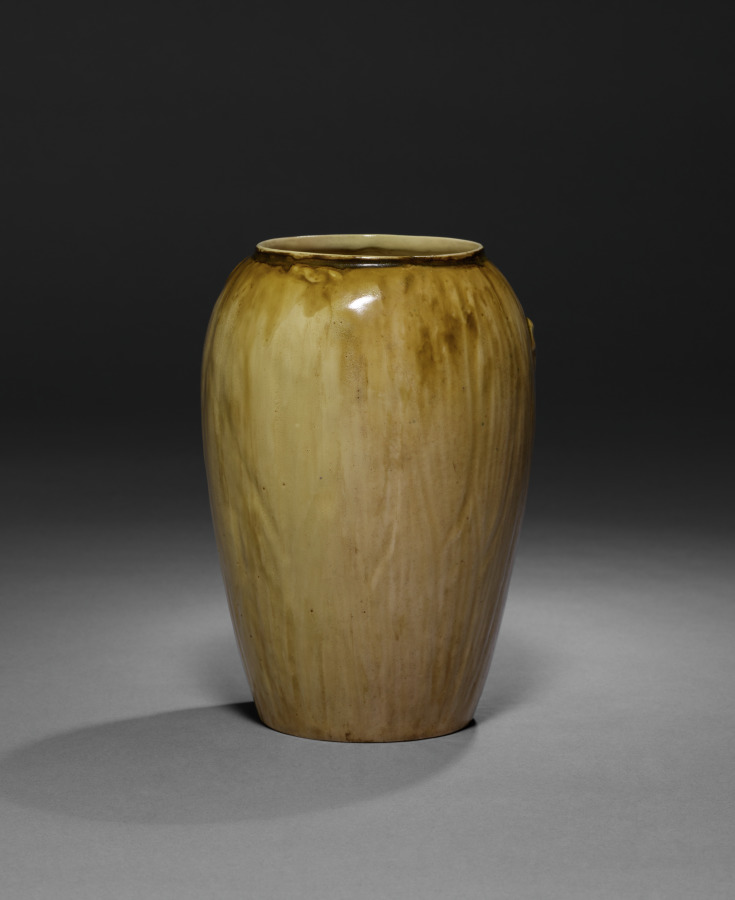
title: Ginger Jar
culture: America, New York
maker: Tiffany Studios (United States, New York, 1902–32)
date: c. 1904–14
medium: glazed white clay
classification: Ceramic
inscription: LCT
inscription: Tiffany Favrile Pottery P413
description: By 1900 Louis Comfort Tiffany had expanded his empire by increasing the firm’s production of “fancy goods,” including inkstands, candlesticks, clocks, small boxes, desk sets, tea screens, and other functional objects. Along with the array of artistic glass designs from his factory in Corona, Queens, works in ceramic, bronze, other metals, and even jewelry abounded. These smaller, more affordable luxury items were designed with as much thought to artistry as the great stained glass windows and lamps through which the firm enjoyed unrivaled success.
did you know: Ceramic works were Louis Comfort Tiffany's contribution to the art pottery movement of the early 1900s.